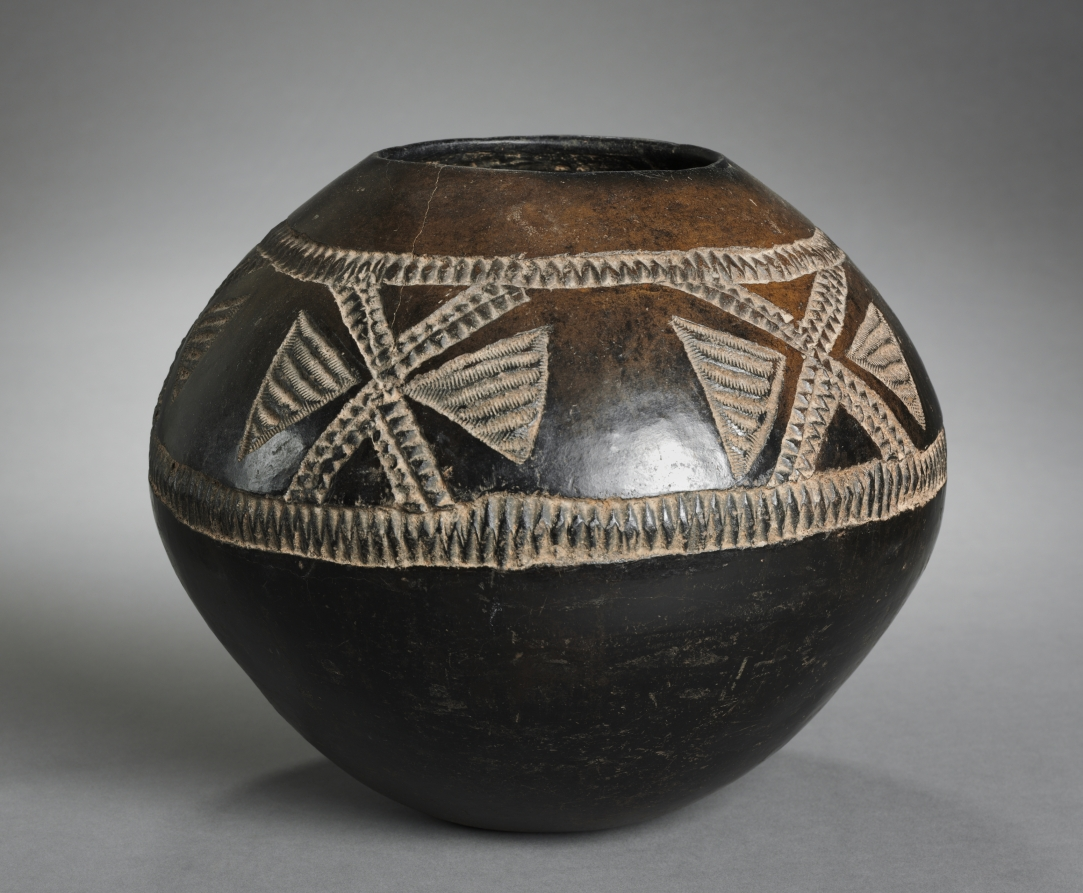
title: Pot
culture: Southern Africa, South Africa, Zulu-style potter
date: 1900s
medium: Terracotta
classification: Vessels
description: Within the Zulu culture (the Northern Nguni tribe), the making of beer pots is the traditional function of women. A potter will travel far searching in riverbeds or for anthills that can supply the correct clay for the vessels. Formed using the coil technique and smoothed using flattened stones, the pots are fired in a dug-out earthen "kiln," and covered with palm leaves, whose oil results in the blackened, shiny texture of the vessels. Years of use deepen this texture to a rich woody patina.